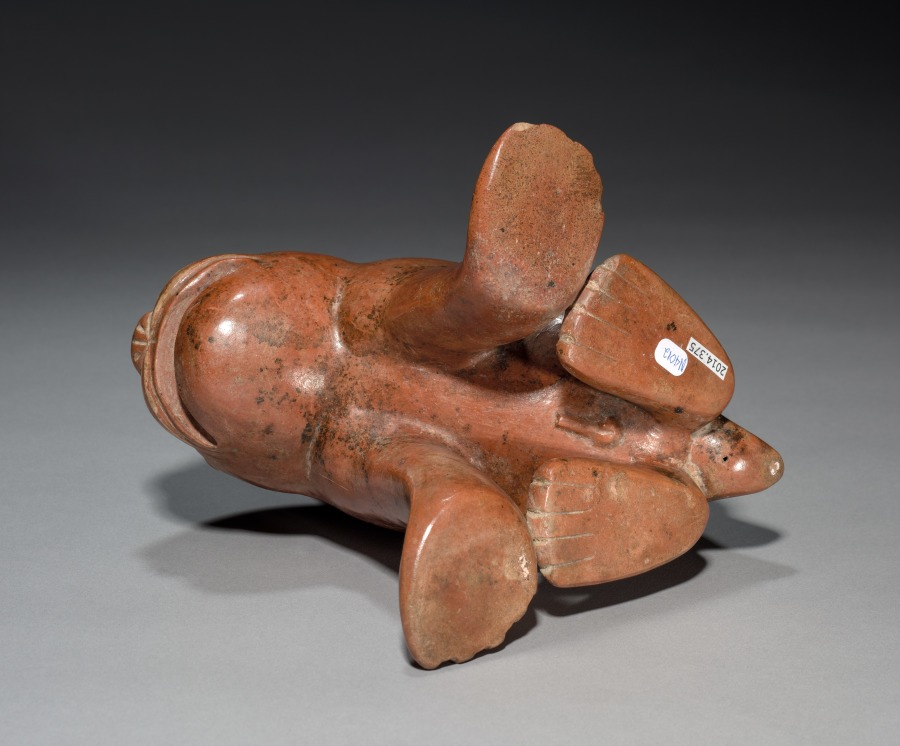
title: Sea Lion Pup Vessel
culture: Central Andes, North Coast, Moche people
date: 200–850 CE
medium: ceramic and slip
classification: Ceramic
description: Sea lions commonly appear in Moche art as effigy vessels, like this appealing pup, or in complex scenes that often show them as the targets of human hunters. They may have been prized in part for the beach pebbles found in their stomachs; modern Peruvian folk healers consider such pebbles to have powerful medicinal qualities. Also, colonial-period natives believed that sea lions carried the dead to off-shore islands, an idea that could date to Moche times.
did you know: Moche potters were skilled at producing charming images using only red and white slip.